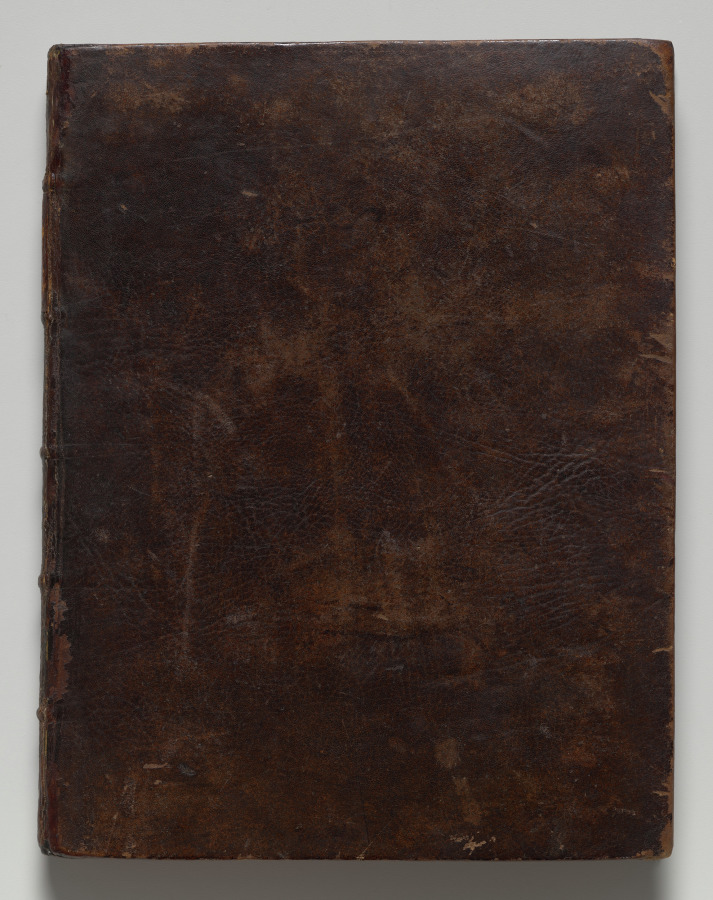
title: The Exercise of Armes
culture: Netherlands, The Hague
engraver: Jacob de Gheyn II (Netherlandish, 1565–1629)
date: 1607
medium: leather bound paper, 117 engraved plates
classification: Bound Volume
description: The Exercise of Armes, published in 1607–8, is one of the most famous manuals of arms. Jacob De Gheyn's book became popular all over Europe and was quickly translated into several languages. Its 117 copper engravings portray the step-by-step sequence for training foot soldiers in the handling of standard weaponry of 17th-century warfare: muskets, matchlock or calivers, and pikes.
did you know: The depiction of the soldiers in this book inspired Rembrandt when painting his famous The Night Watch.